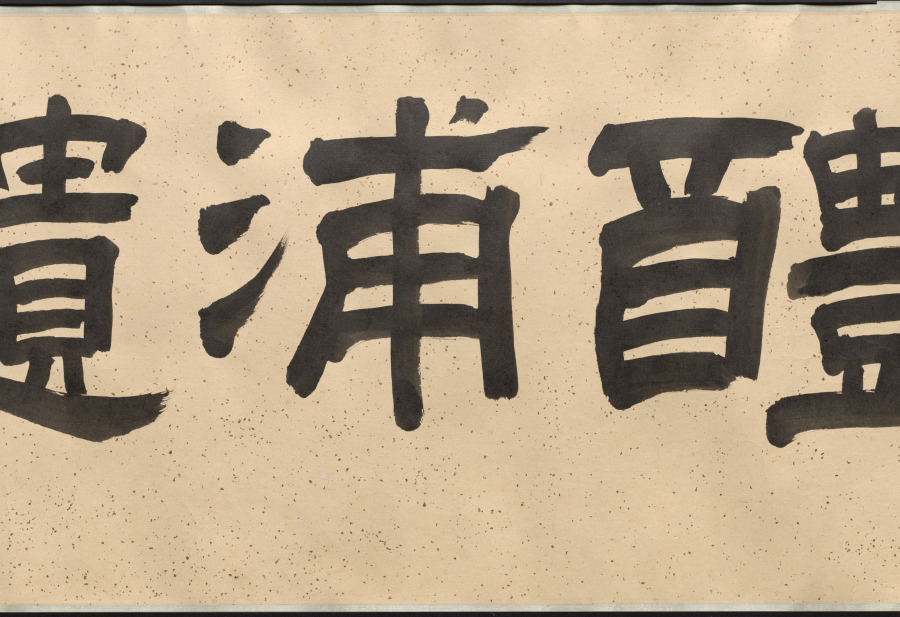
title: Rocks, Orchid, and Bamboo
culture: China, Qing dynasty (1644-1911)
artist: Shitao (Chinese, 1642–1707)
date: 1662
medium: handscroll; ink on paper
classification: Painting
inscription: Title colophon in four characters with signature and two seals on gold-flecked paper.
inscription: Artist's signature, inscription (with date of 1662), five seals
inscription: Colophon with two seals.